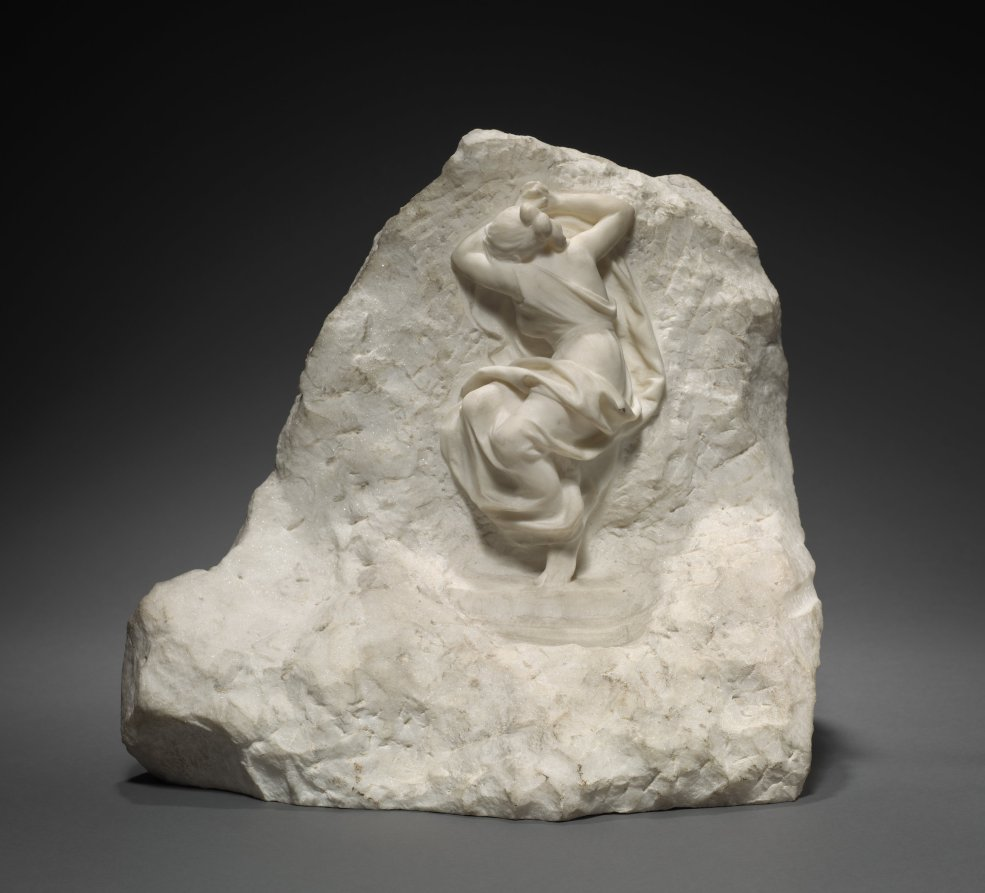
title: Seated Figure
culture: France, 19th century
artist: Édouard Charles Marie Houssin (French, 1847–1919)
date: c. 1860 – 1919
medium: marble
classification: Sculpture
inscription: Signed lower right: "E. Hovssin"